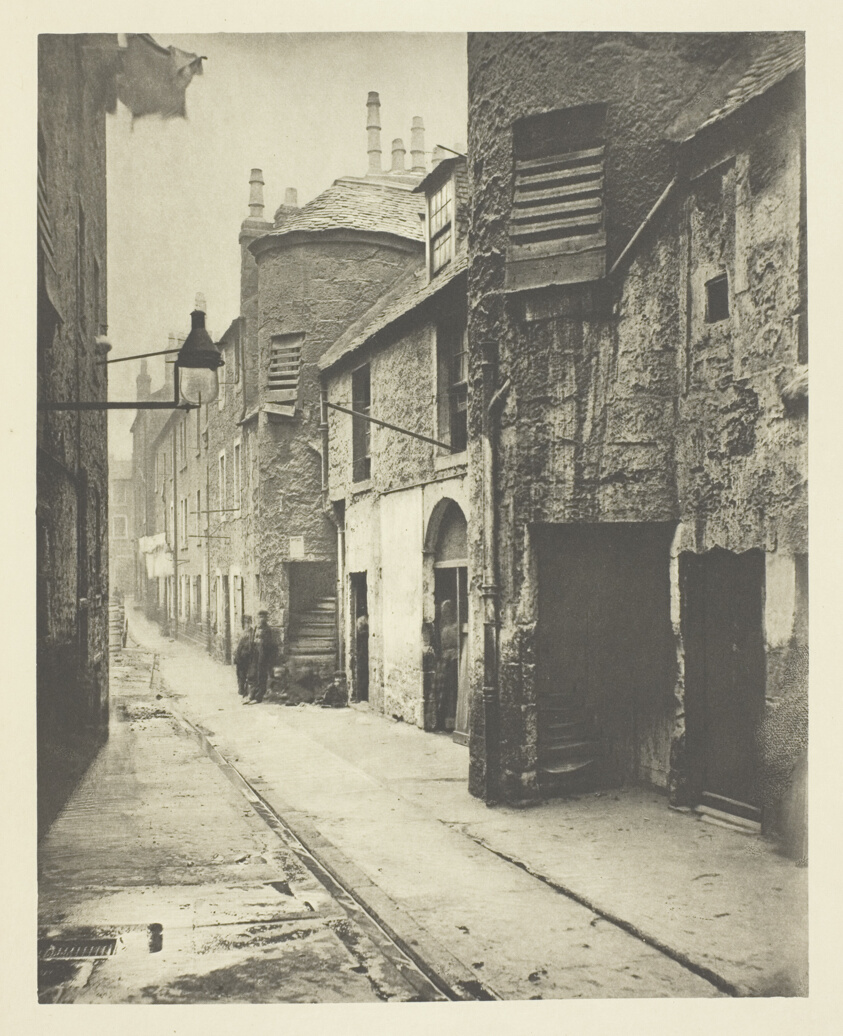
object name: Photograph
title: Close No. 139 Saltmarket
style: 19th century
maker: Thomas Annan (Scottish, 1829–1887)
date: 1868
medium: Photogravure, plate 32 from the book "The Old Closes & Streets of Glasgow" (1900)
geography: Scotland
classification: photograph; photography